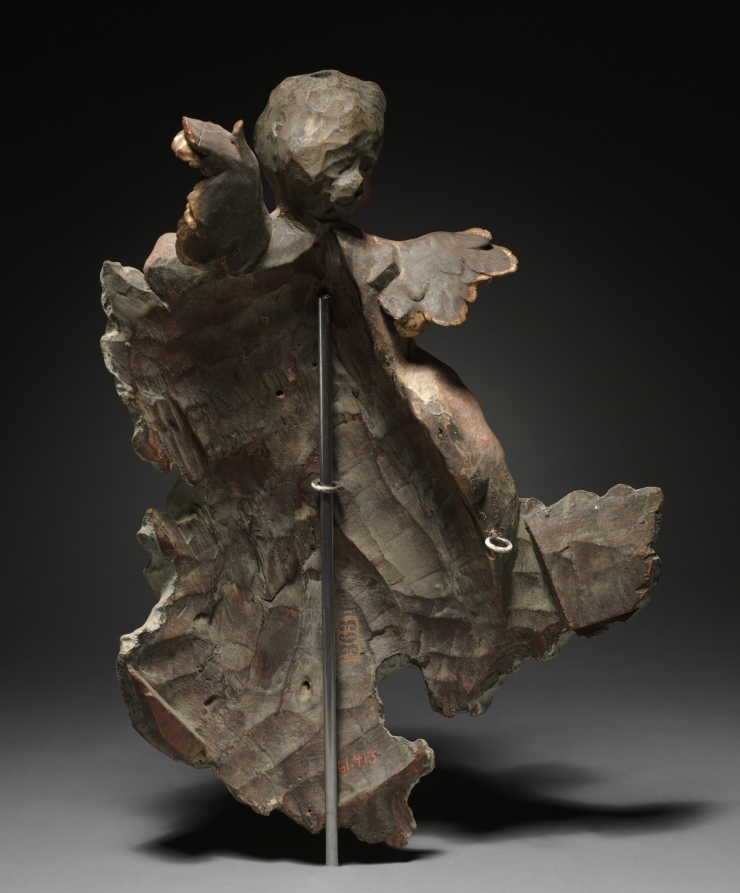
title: Putto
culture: Germany, Munich, 18th century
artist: workshop of Ignaz Günther (German, 1725–1775)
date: c. 1760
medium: painted and gilded wood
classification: Sculpture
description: This charming winged putto reclines on a cloud, hands clasped in an attitude of adoration. It is probably a fragment of a large decorative scheme of a church, perhaps the Johanneskirchen near Munich.